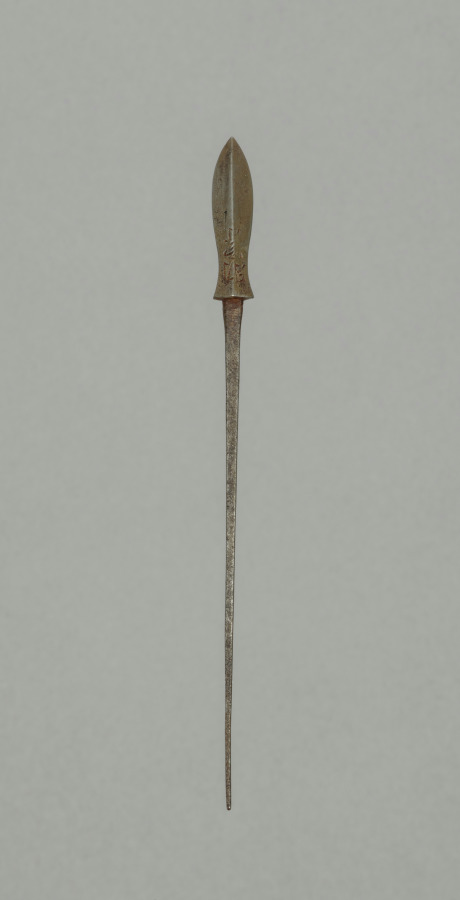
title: Arrow Point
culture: Japan, Edo period (1615–1868)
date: 1700s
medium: steel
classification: Arms and Armor